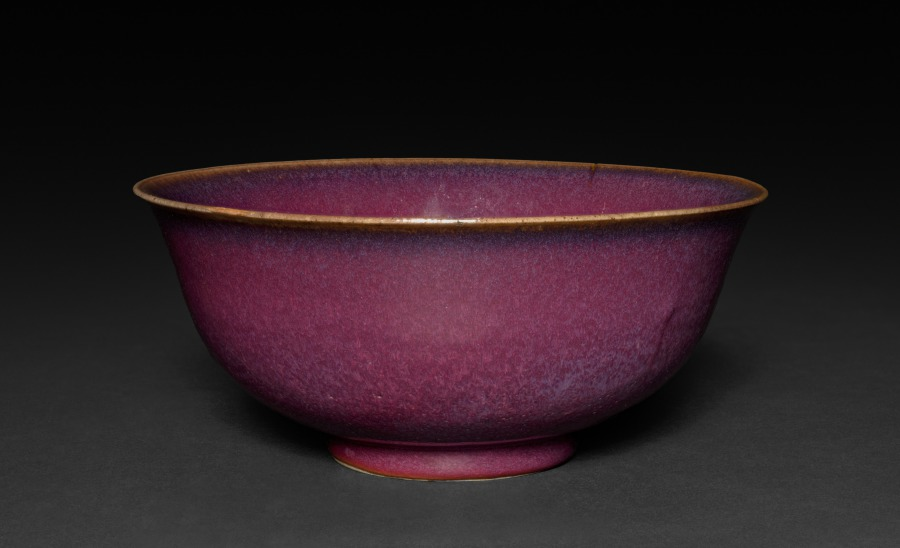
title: Bowl: Jun ware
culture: South China, Yuan dynasty (1271-1368) - Ming dynasty (1368-1644)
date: 14th-15th Century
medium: glazed gray stoneware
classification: Ceramic